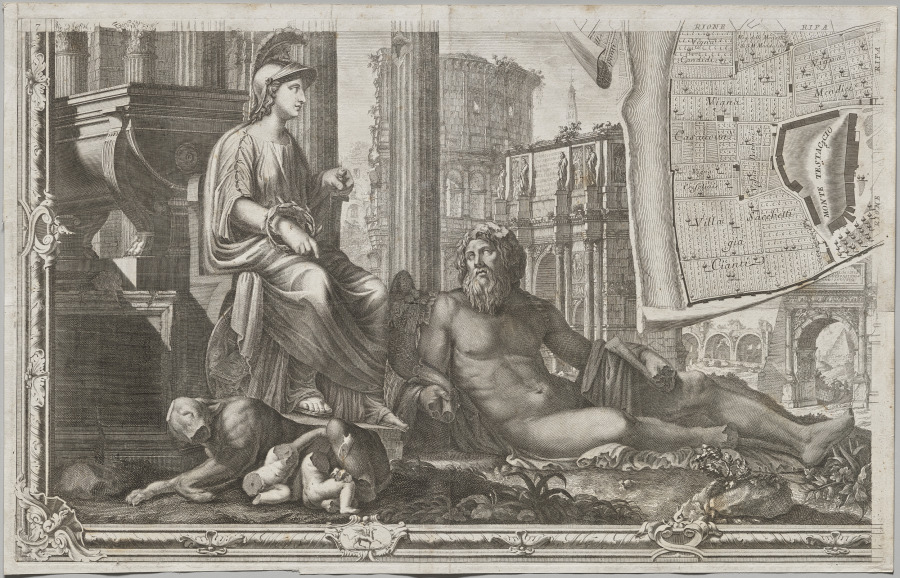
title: Nuova pianta di Roma data in luce da Giambattista Nolli l’anno MDCCXLVII, known as La Pianta Grande di Roma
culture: Italy, 18th century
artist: Giovanni Battista Nolli (Italian, 1701–1756)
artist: Carlo Nolli (Italian, 1690–1790)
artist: Rocco Pozzi (Italian, 1701–1774)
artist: Pietro Campana de Soriano (Italian, 1725–c. 1779)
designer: Stefano Pozzi (Italian, 1699–1768)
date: 1748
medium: etching and engraving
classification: Print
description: The monumental Pianta Grande di Roma, or Large Plan of Rome, which measures about 5 x 7 feet when its twelve plates are assembled, is a landmark in both cartography and printmaking. The map is considered the first scientific rendering of Rome, establishing new standards of accuracy and thoroughness when it was published in 1748. Devised by the Lombard architect and surveyor Giovanni Battista Nolli (Italian, 1701-56), the creation of the map required over ten years of surveying the city carried out by Nolli and a team of assistants with the help of new measuring devices. In Nolli’s “ichnographic” (also called “ground”) plan, architectural features and the urban infrastructure are reduced to a single horizontal slice, a minutely detailed footprint that conveys dimensions, proportions, and orientations to scale with the utmost clarity.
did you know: To make this map, Pope Clement XII granted the mapmaker permission to measure courtyards and other interior, inaccessible spaces in monastic communities, even those in nuns’ convents, which was controversial at the time.